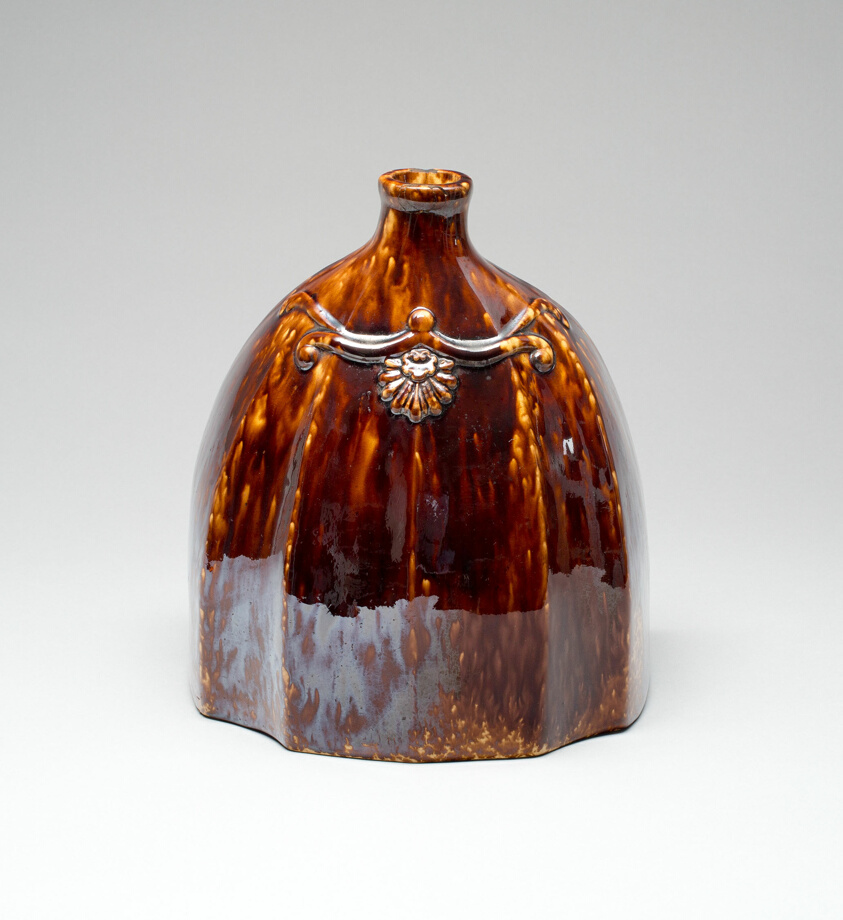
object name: Decorative Arts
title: Footwarmer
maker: Lyman, Fenton & Company; American, 1849–52; Bennington, Vermont, or; United States Pottery Company; American, 1847–58; Bennington, Vermont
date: 1840–60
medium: Earthenware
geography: Bennington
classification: hot-water bottle; american decorative arts; american arts; ceramics; decorative arts